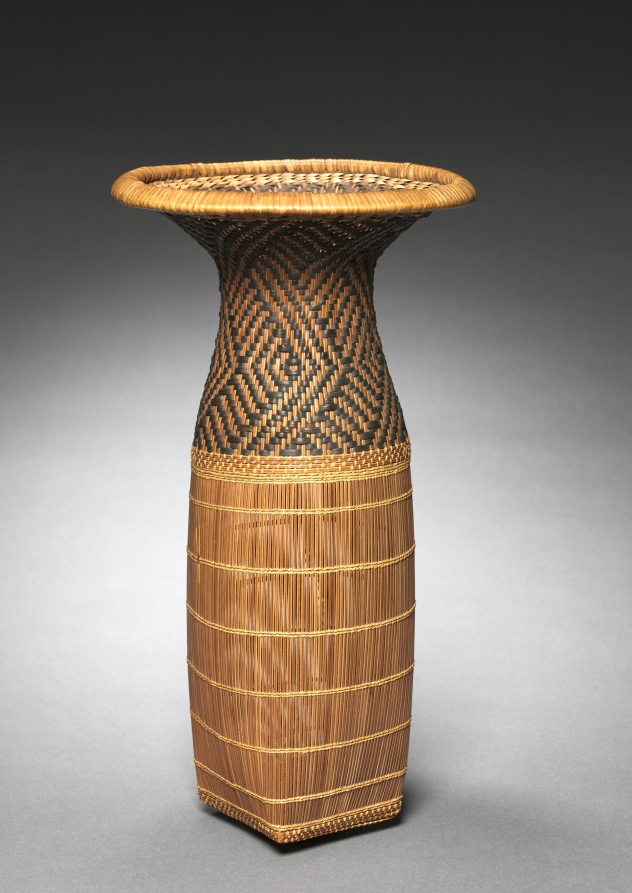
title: Sifting Basket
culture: Africa, Central Africa, Democratic Republic of the Congo or Angola, possibly Chokwe-style maker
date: before 1915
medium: Plant fibers and dye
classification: Tool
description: The Chokwe pounded maize into a course flour and then sifted it in order to separate the finest flour for cooking. This domestic object exhibits a refined, elegant artistry in its proportion, shape, and integrated woven textures.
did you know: F. M. Rapp––who acquired this basket in Congo while working for a diamond mine––attended the Case School of Applied Science in Cleveland.